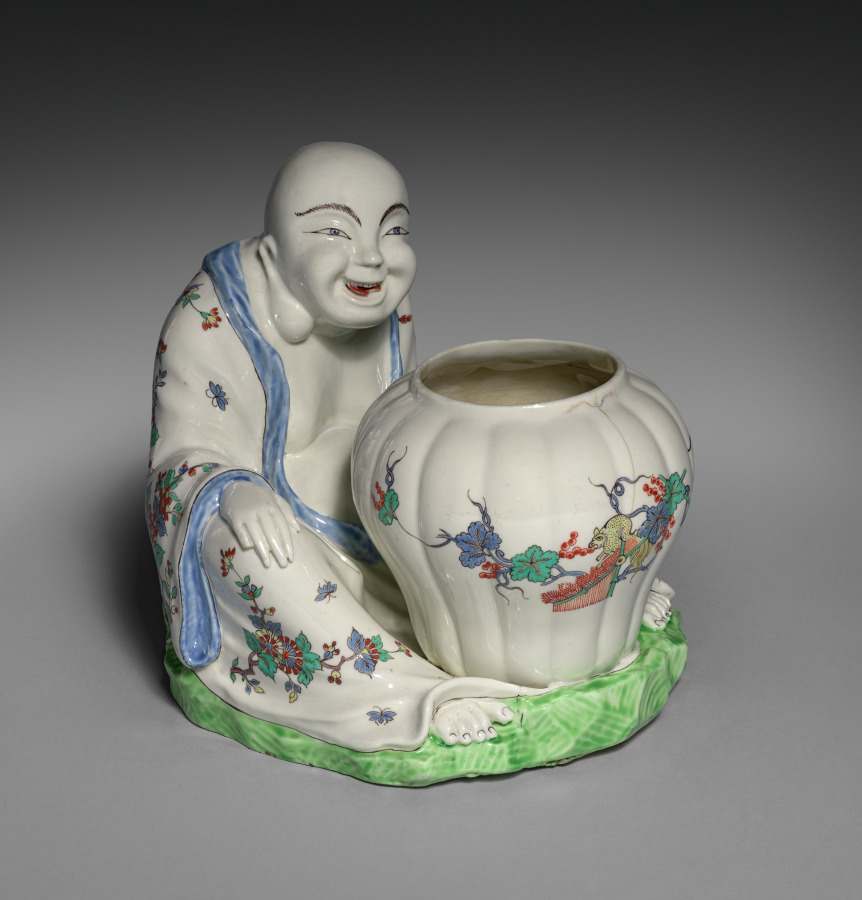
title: Figure of a Chinese with Jar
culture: France, Chantilly, 18th century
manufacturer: Chantilly Porcelain Factory (French)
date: c. 1735– 1740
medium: soft-paste porcelainwith enamel decoration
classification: Ceramic